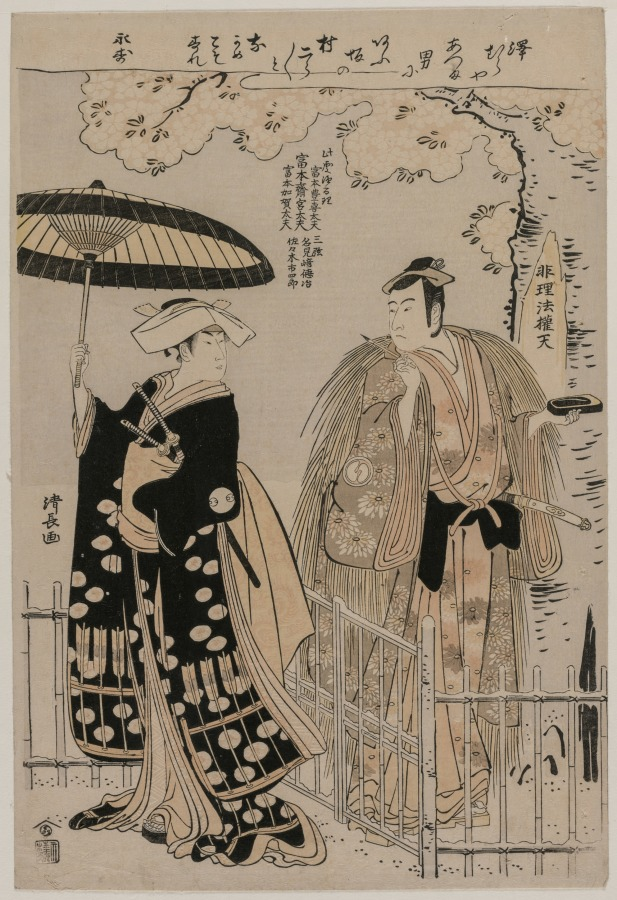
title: Sawamura Sojuro III and Arashi Murajiro as Kusunoki Masatsura and Koto no Naishi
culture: Japan, Edo period (1615–1868)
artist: Torii Kiyonaga (Japanese, 1752–1815)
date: 1786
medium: color woodblock print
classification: Print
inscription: Signature: Kiyonaga ga Publisher: Nishimuraya Yohachi (Eiju han, emblem)